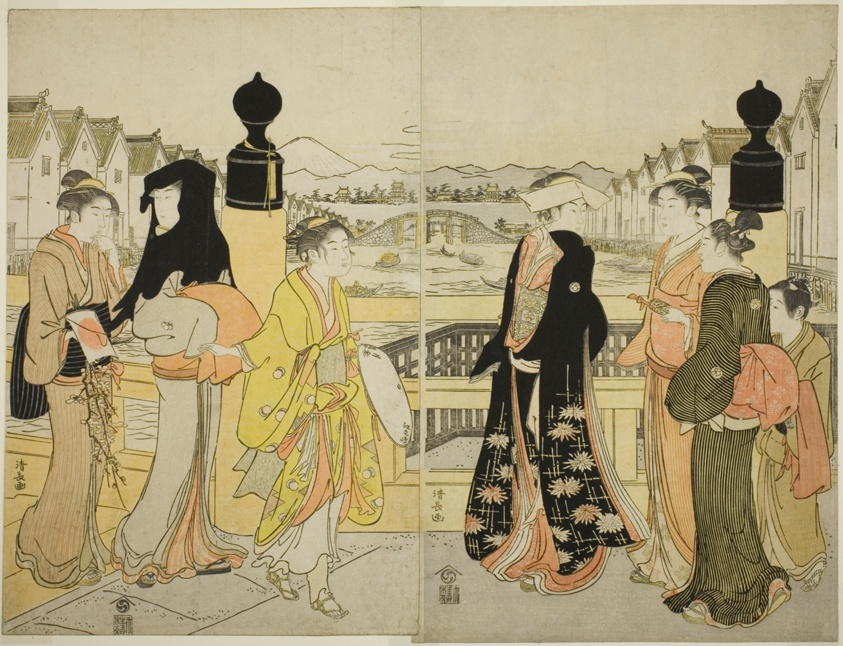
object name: Print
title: Women Crossing Nihonbashi Bridge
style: Japanese (culture or style)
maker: Torii Kiyonaga (Japanese, 1752-1815)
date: c. 1786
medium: Color woodblock print; oban diptych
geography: Japan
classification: woodblock print; print; asian art